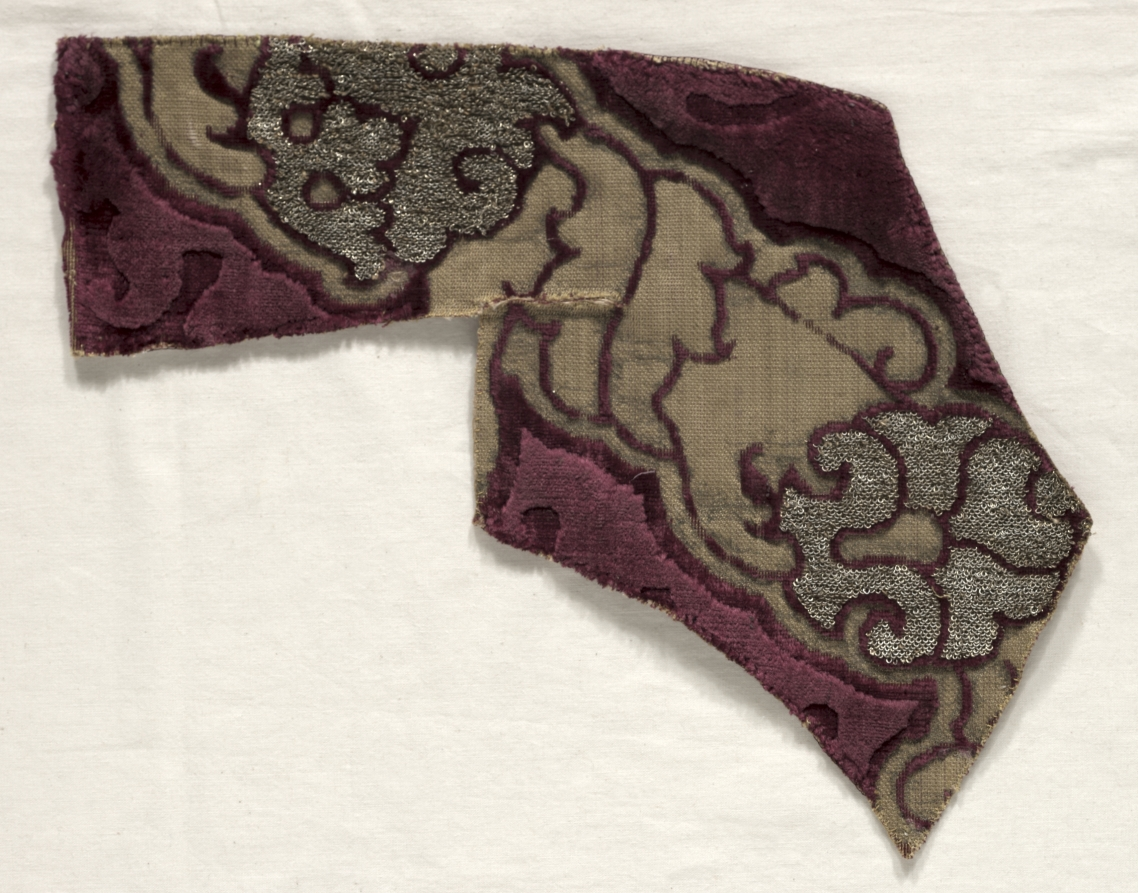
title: Velvet Fragment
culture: Italy or Spain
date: 1400s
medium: velvet weave (cut with two heights of pile, voided, brocaded): silk and gold thread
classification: Velvet